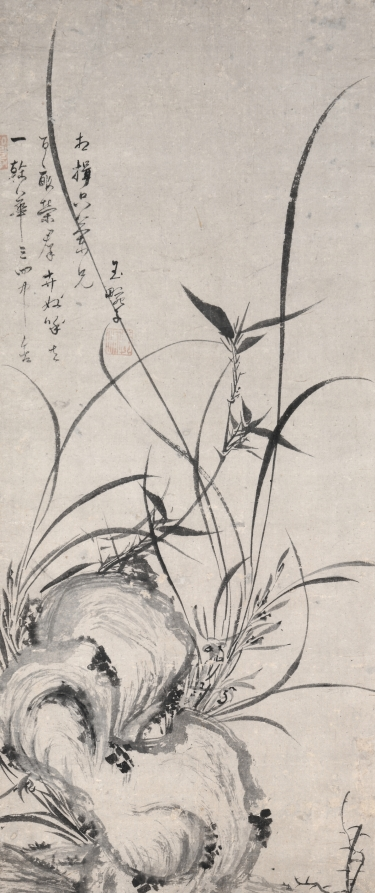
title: Rock, Bamboo, and Orchids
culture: Japan, Muromachi period (1392–1573)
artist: Gyokuen Bonpō (Japanese, 1348–after 1420)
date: late 1300s–early 1400s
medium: hanging scroll; ink on paper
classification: Painting